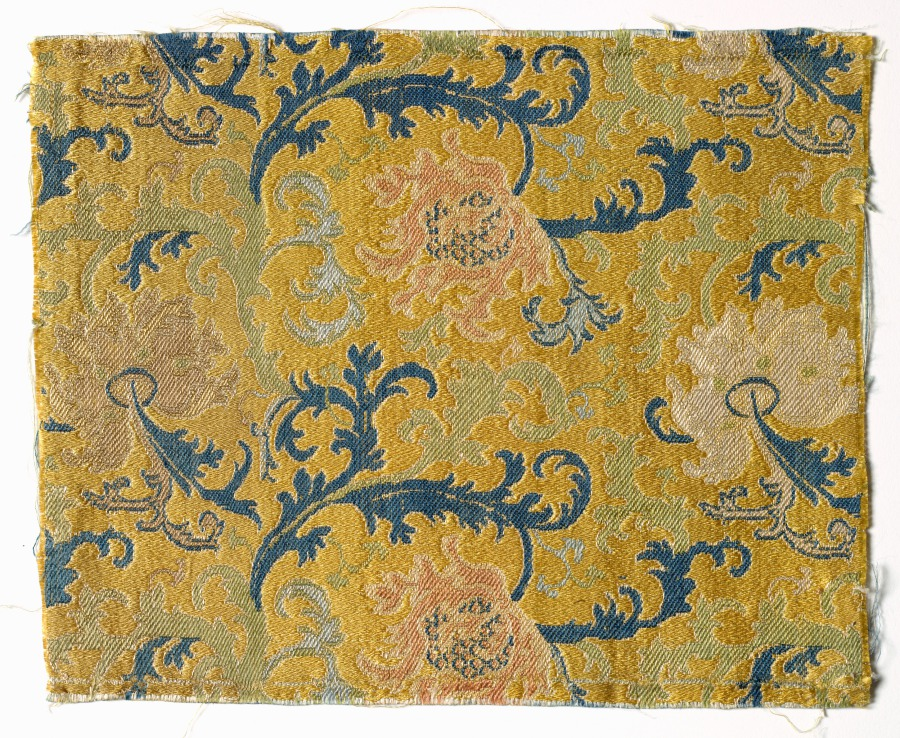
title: Fragment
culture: China, 18th century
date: 1700s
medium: satin ground; silk diasper weave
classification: Textile